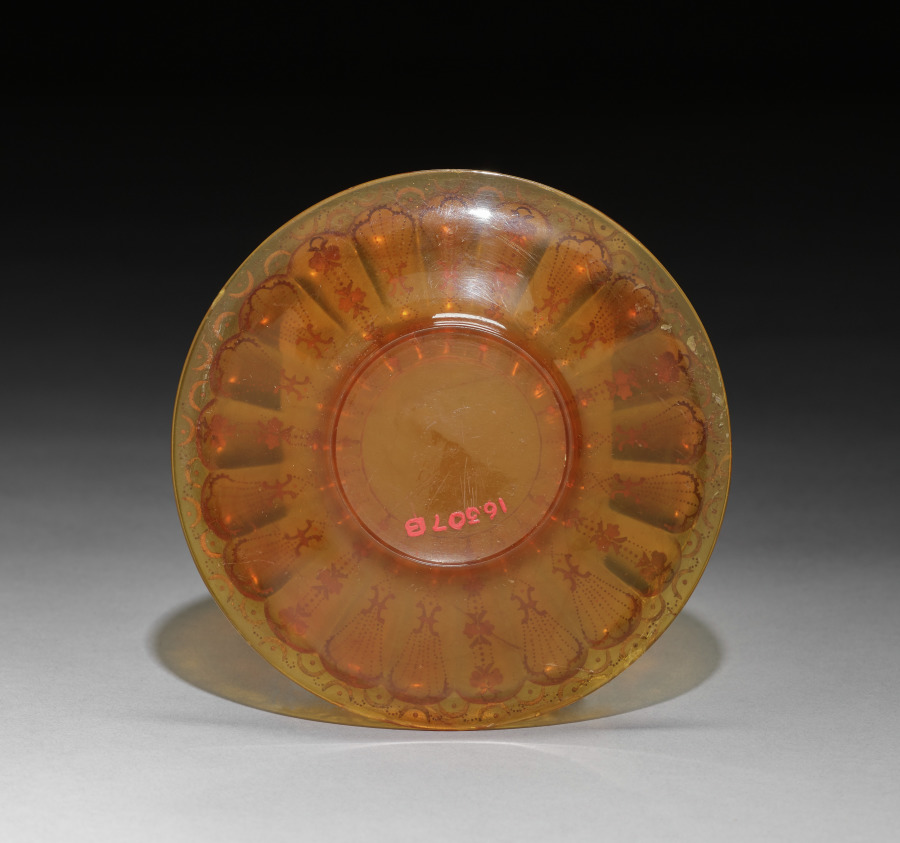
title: Saucer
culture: France, 18th century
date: c. 1730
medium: amber decorated with inlaid gold and mother-of-pearl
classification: Miscellaneous